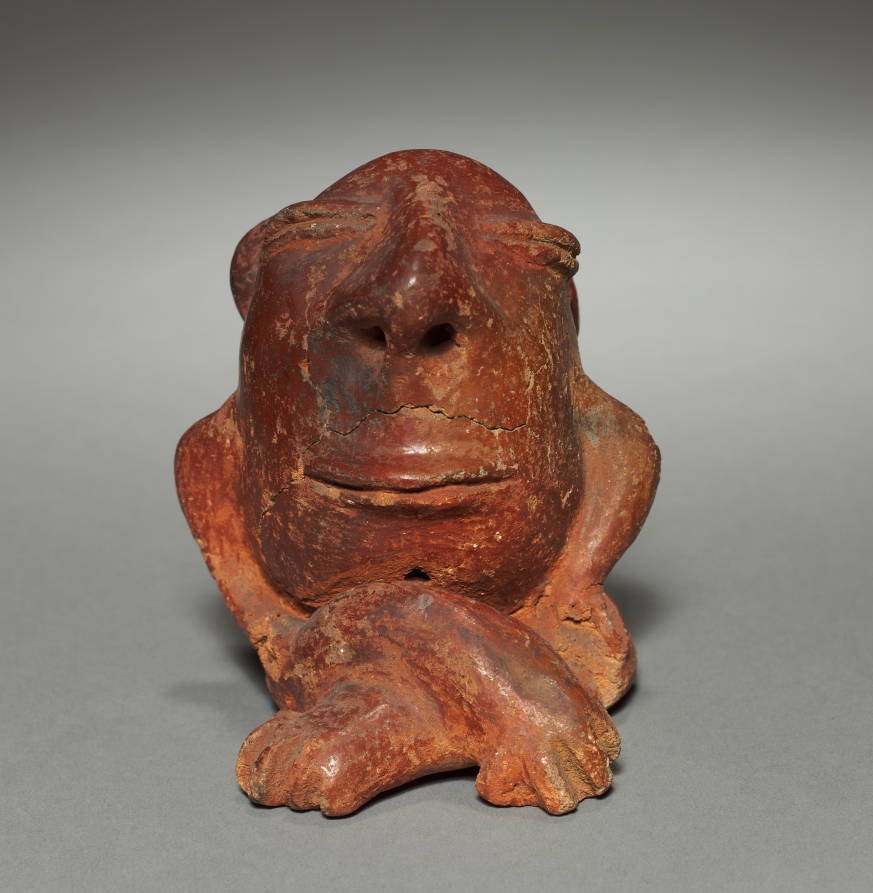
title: Grotesque Figure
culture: Colombia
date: before 1921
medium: red ware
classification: Ceramic